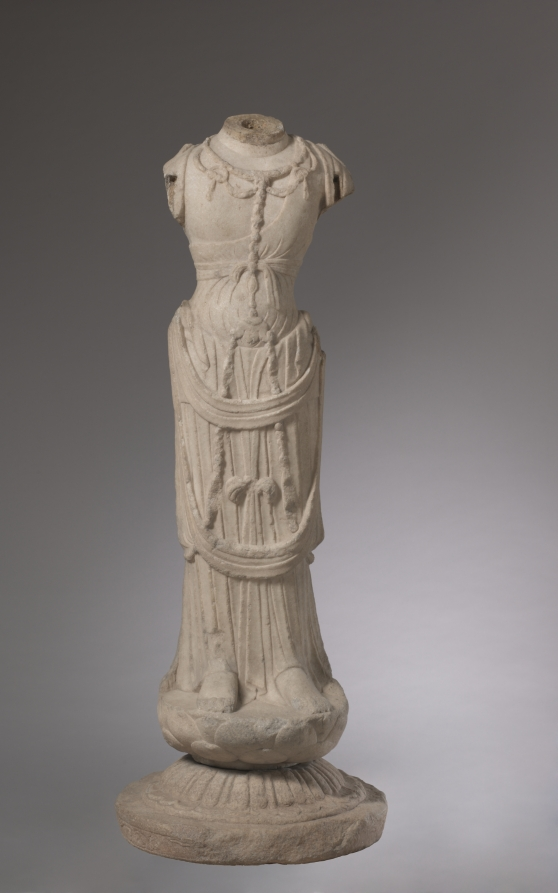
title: Bodhisattva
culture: China, Hebei province, Tang dynasty (618-907)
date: 700s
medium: white marble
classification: Sculpture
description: The bodhisattva is an enlightened being dedicated to the spiritual awakening of all beings. This white marble torso exemplifies the quest for refinement and plasticity of form that mark the golden era of Tang Chinese Buddhist sculpture. The statue was conceived with great power and grandeur. The slight sway of the hip on one side and upraised shoulder on the other result in an elegant S-curve. Emphatic lines cut into the stone create a sense of rhythm and reveal the sculptor’s skill and sureness of execution.